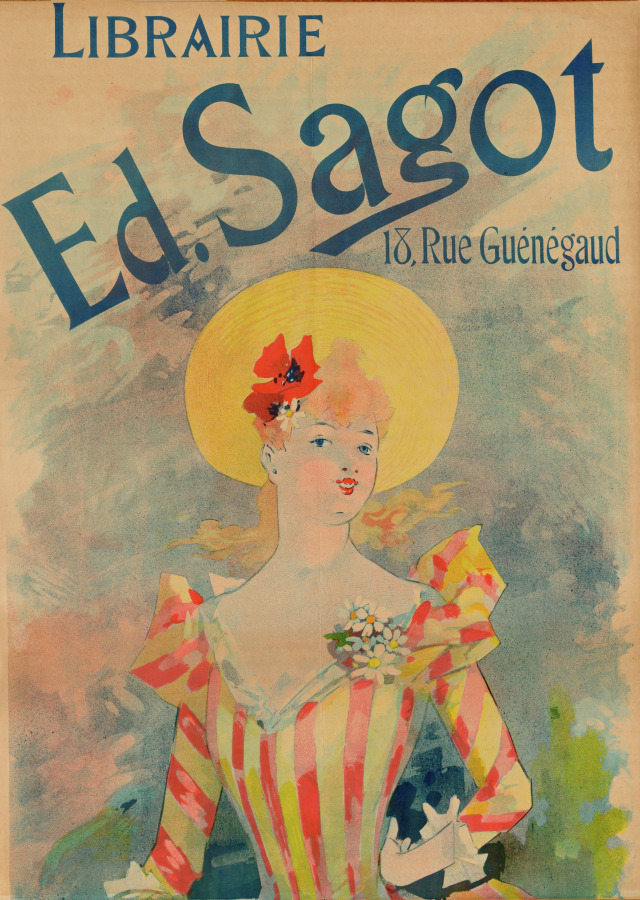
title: Bookstore Ed. Sagot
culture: France, Paris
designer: Jules Chéret (French, 1836–1932)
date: 1891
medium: color lithograph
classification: Print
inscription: on back of upper sheet, in pencil: Cheret - Ed. Sagot